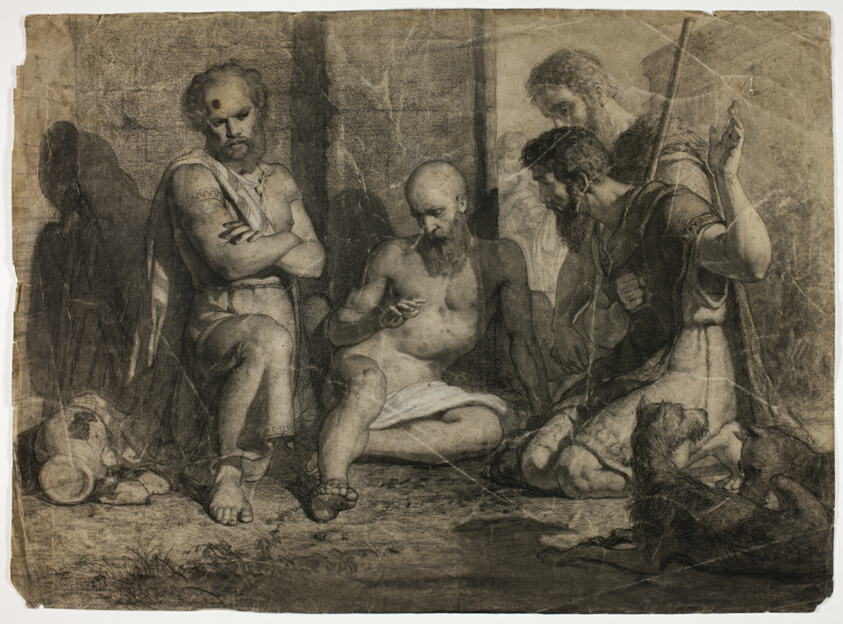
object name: Drawing and Watercolor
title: Diogenes Asking Alexander the Great to Step Aside (recto); Striding Academic Male Nude (verso)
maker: Unknown Artist; French, 19th century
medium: Charcoal and black chalk with stumping, heightened with white chalk (recto), and charcoal with stumping (verso) on cream laid paper with blue fibers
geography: France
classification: charcoal; drawings (visual works); prints and drawing; chalk; paper